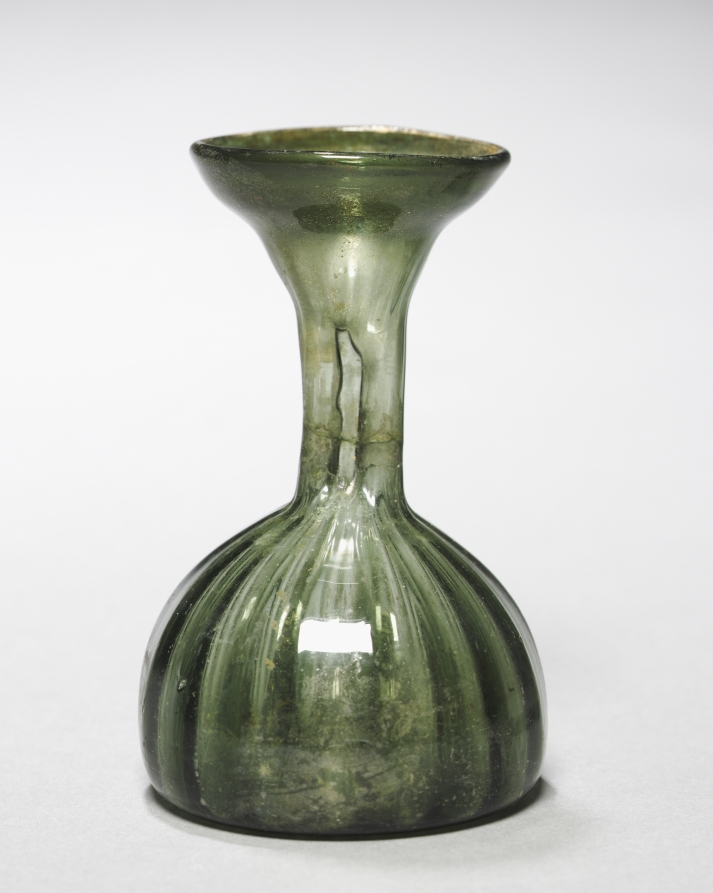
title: Flask (Kuttrolf)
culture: Germany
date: 1400s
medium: green glass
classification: Glass